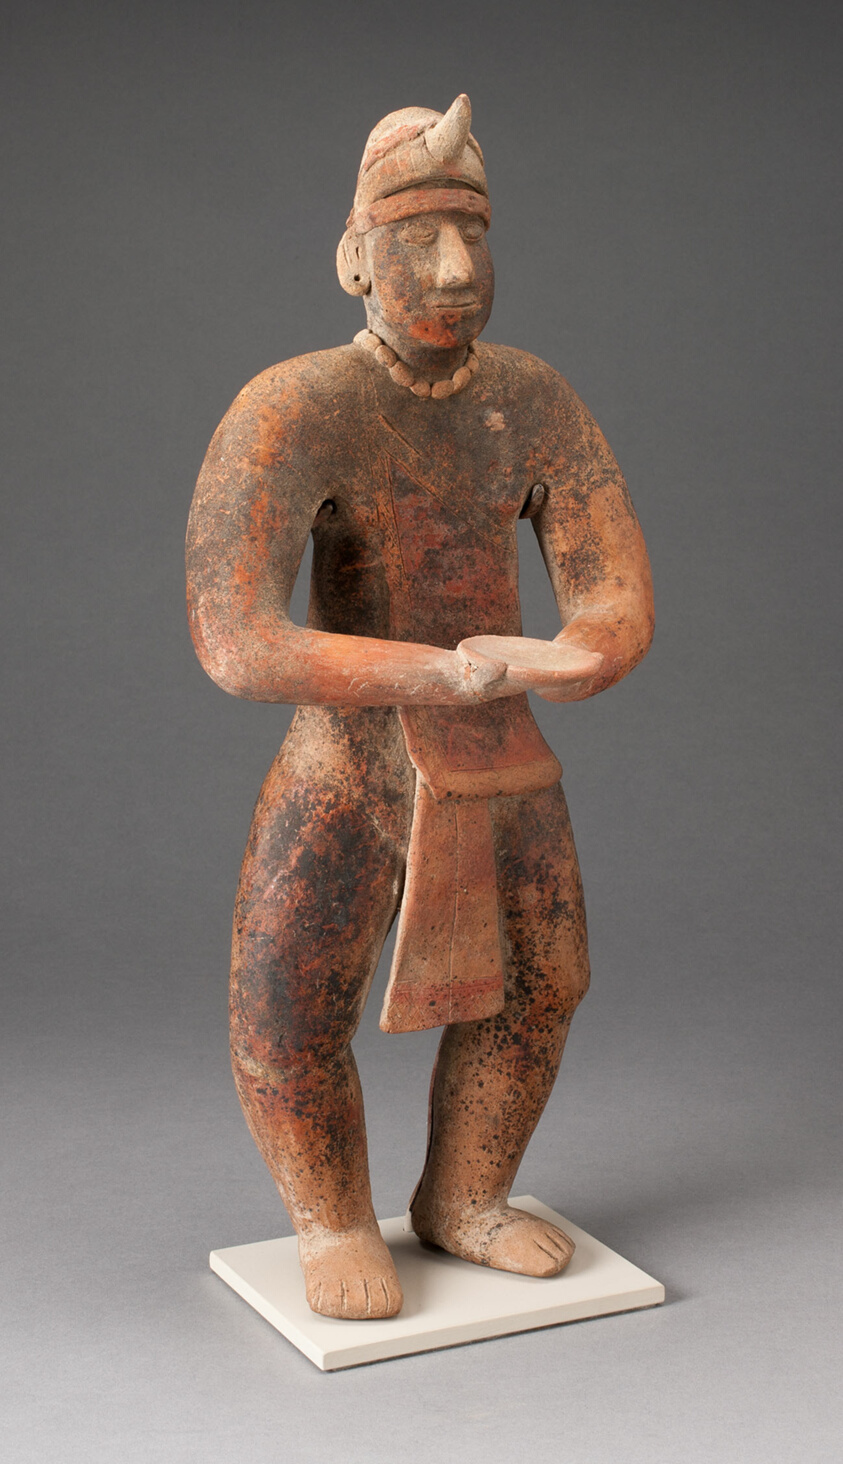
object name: Sculpture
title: Standing Male Figure Holding a Plate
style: colima, mesoamerican, Pre-Columbian, americas, Arts of the Americas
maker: Colima (Colima, Mexico)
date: 100–400 CE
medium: Ceramic and pigment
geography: Colima state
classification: earthenware; ceramics; sculpture; art of the americas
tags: people